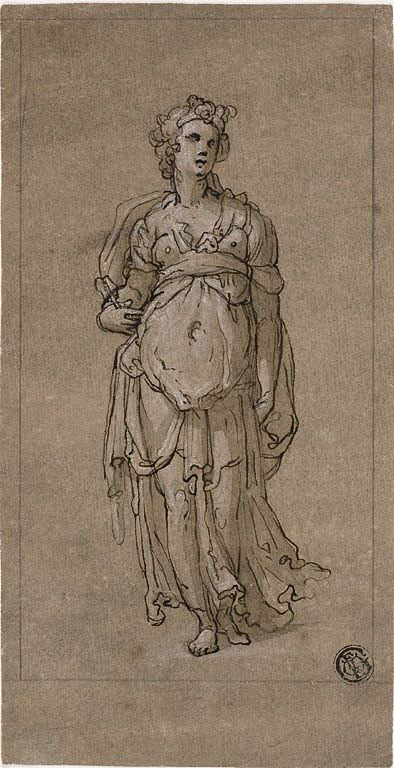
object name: Drawing and Watercolor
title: Standing Female Allegorical Figure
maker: After Federico Zuccaro; Italian, 1540/41-1609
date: 1566/67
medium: Pen and brown ink with brush and brown wash, heightened with white gouache, over traces of graphite, on cream laid paper prepared with brown wash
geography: Italy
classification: ink with wash; drawings (visual works); prints and drawing